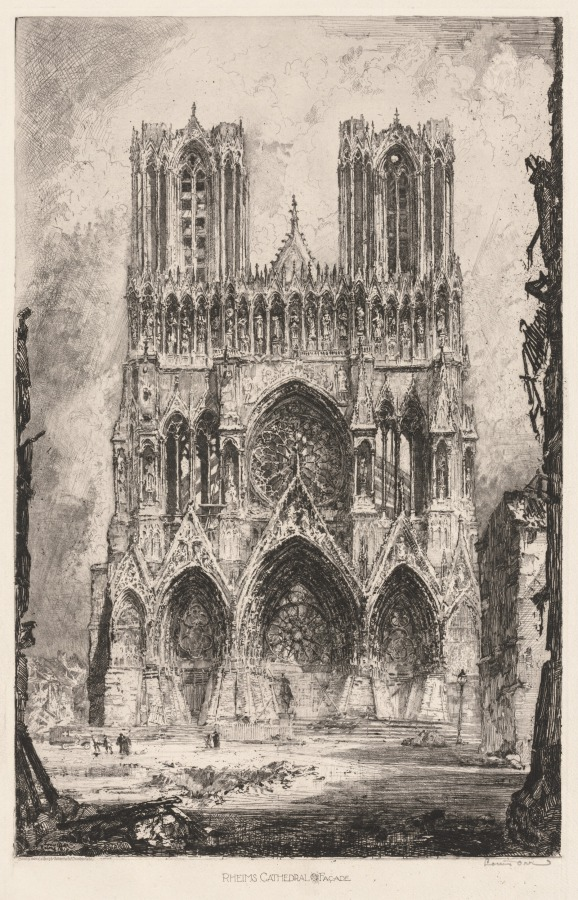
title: Rheims Cathedral, Facade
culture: America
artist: Louis Orr (American, 1879–1966)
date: before 1920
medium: etching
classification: Print